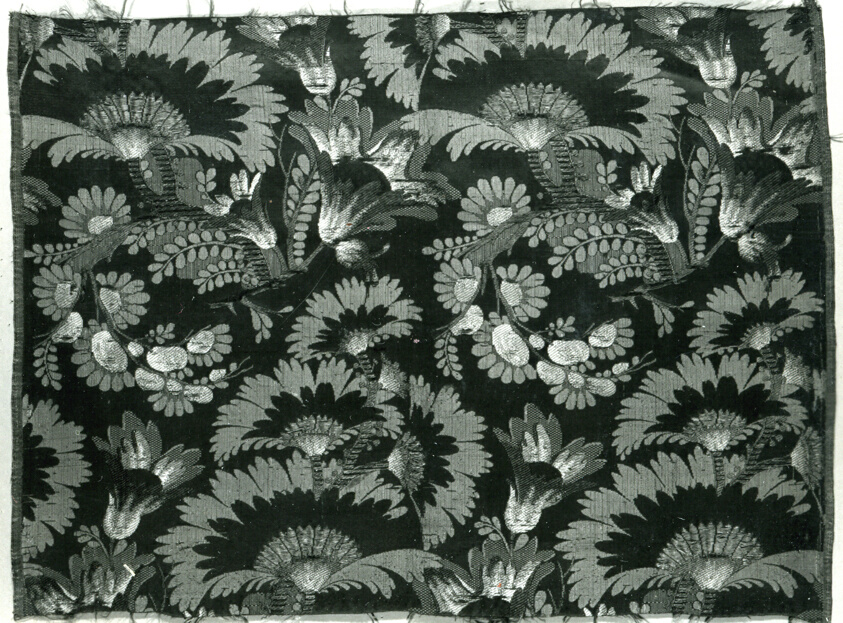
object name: Textile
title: Fragment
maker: France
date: 18th century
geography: France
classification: textile; weaving